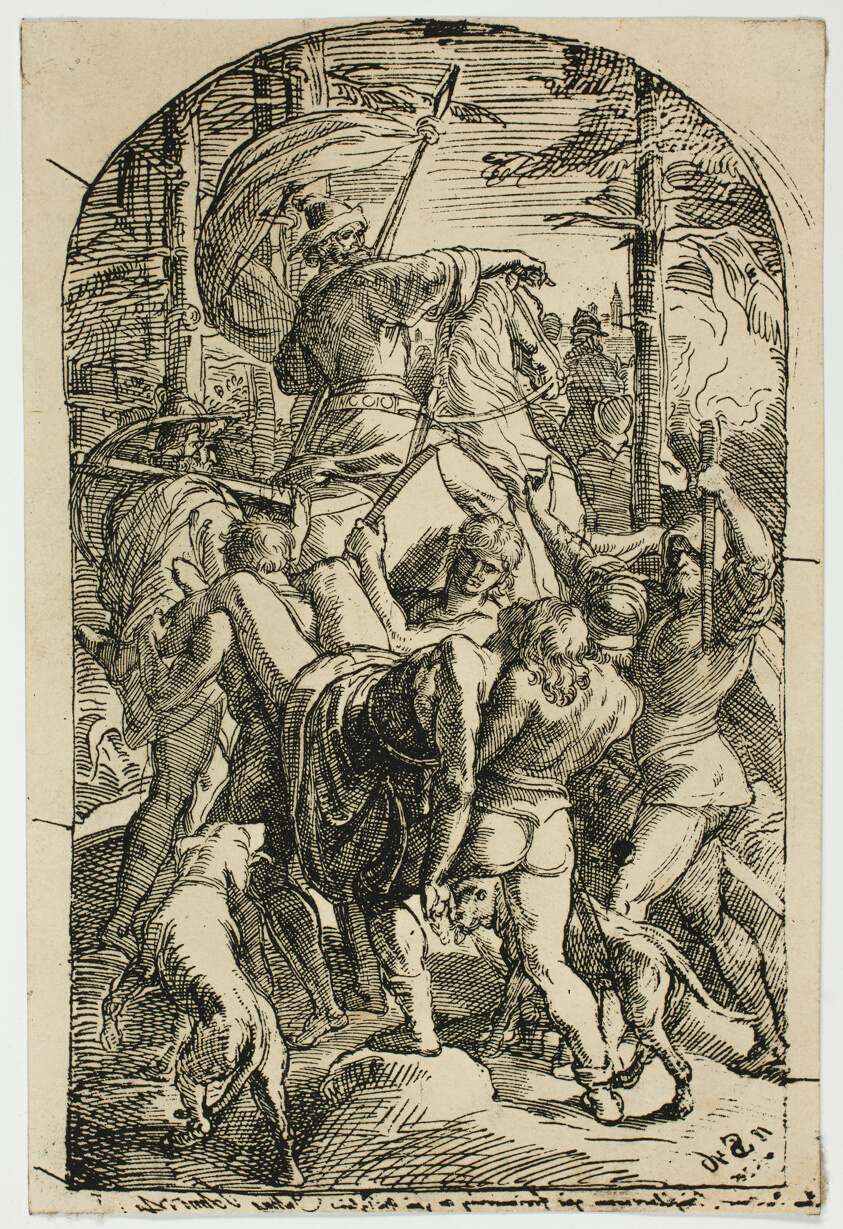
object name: Print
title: Hagen Leaves Siegfried's Body to be Carried Home from the Forest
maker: Julius Schnorr von Carolsfeld (German, 1794-1872)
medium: Etching on tan wove paper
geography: Germany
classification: etching; print; prints and drawing